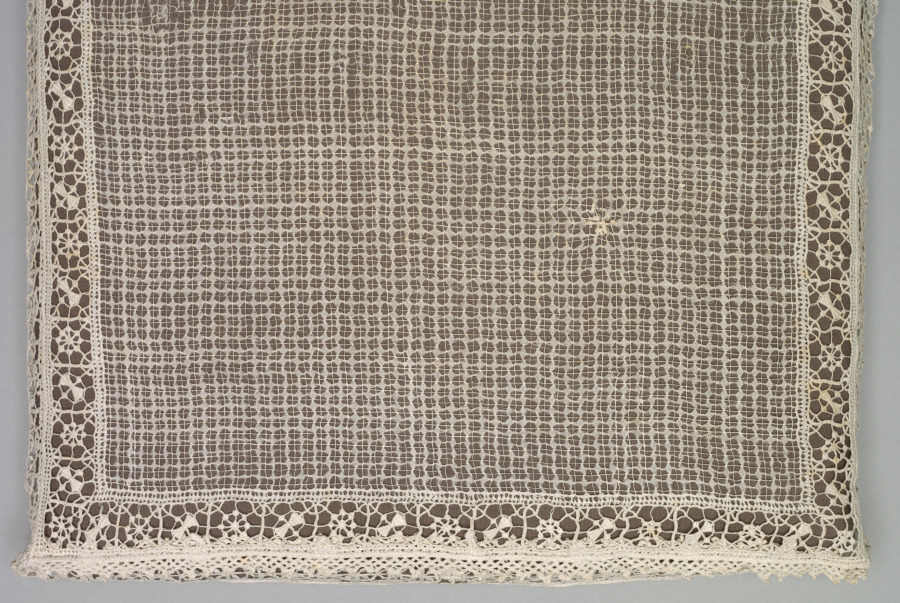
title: Lace Pillow Cover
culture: Italy, Genoa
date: 1600s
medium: Linen: needle lace (drawnwork or Punto Tirato and reticella) and bobbin lace edging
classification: Lace